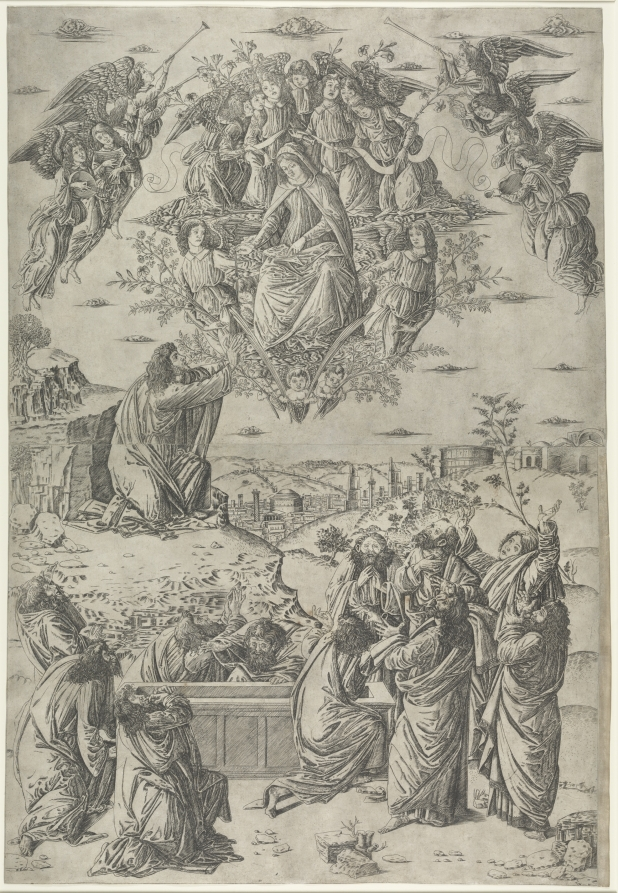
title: The Assumption of the Virgin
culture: Italy, Florence, 15th century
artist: Francesco Rosselli (Italian, 1448-about 1513)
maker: after Sandro Botticelli (Italian, 1444/45–1510)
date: c. 1495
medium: engraving printed on two sheets from two plates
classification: Print